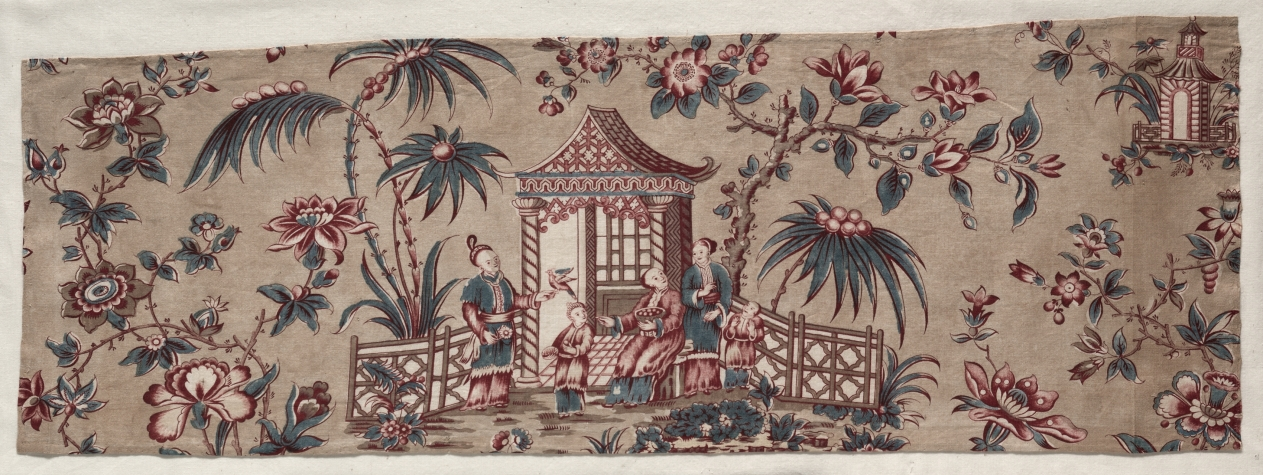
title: Chinoiserie Design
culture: England, early 19th century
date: early 1800s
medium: block printed cotton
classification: Textile